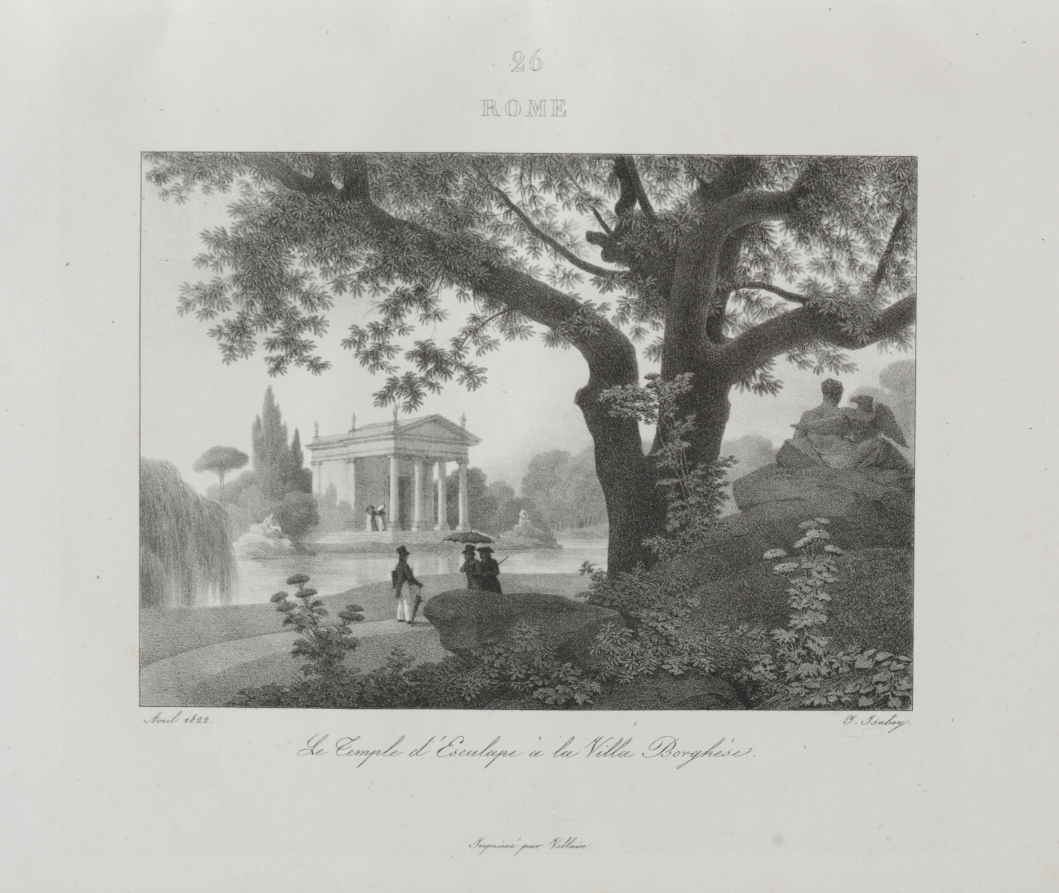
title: Voyage en Italie en 1822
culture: France, 19th century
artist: Jean-Baptiste Isabey (French, 1767–1855)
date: 1833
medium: lithograph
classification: Bound Volume